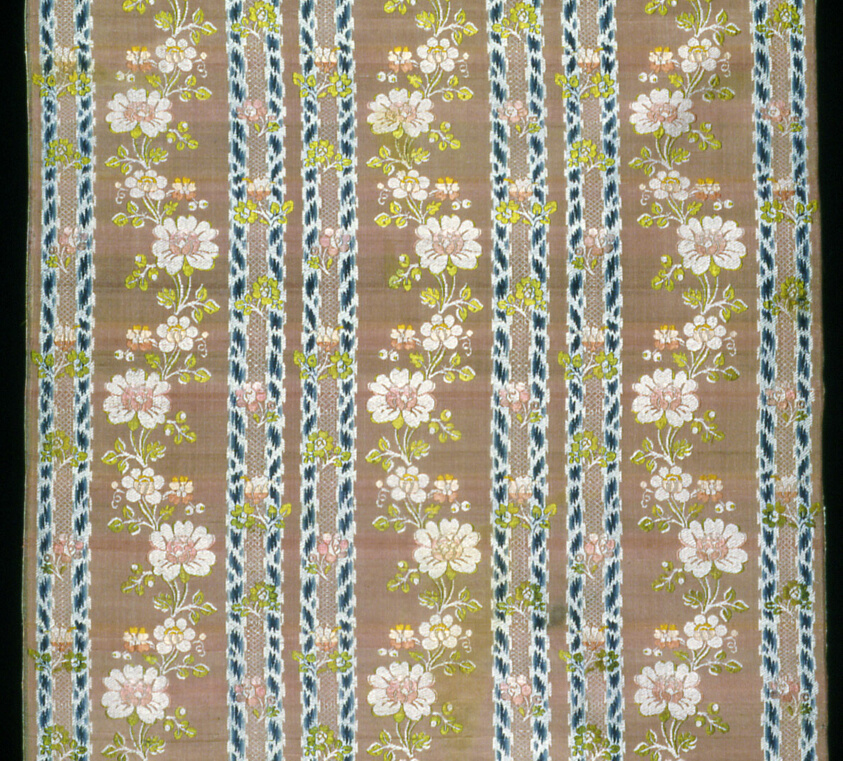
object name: Textile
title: Panel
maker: France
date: 1725/75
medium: Silk, warp-float faced satin weave self-patterned by ground weft floats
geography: France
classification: textile; weaving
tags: flowers, foliage